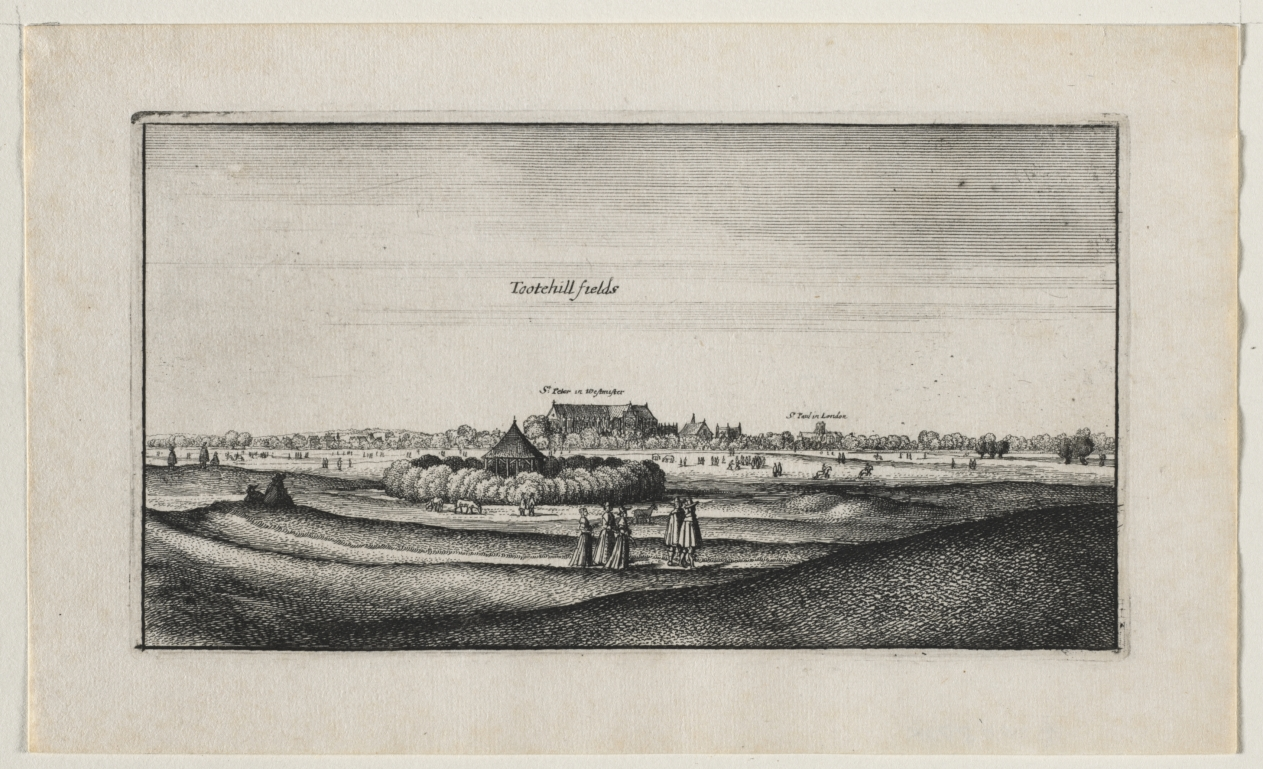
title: Tothill Fields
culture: Bohemia, 17th century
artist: Wenceslaus Hollar (Bohemian, 1607–1677)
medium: etching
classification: Print